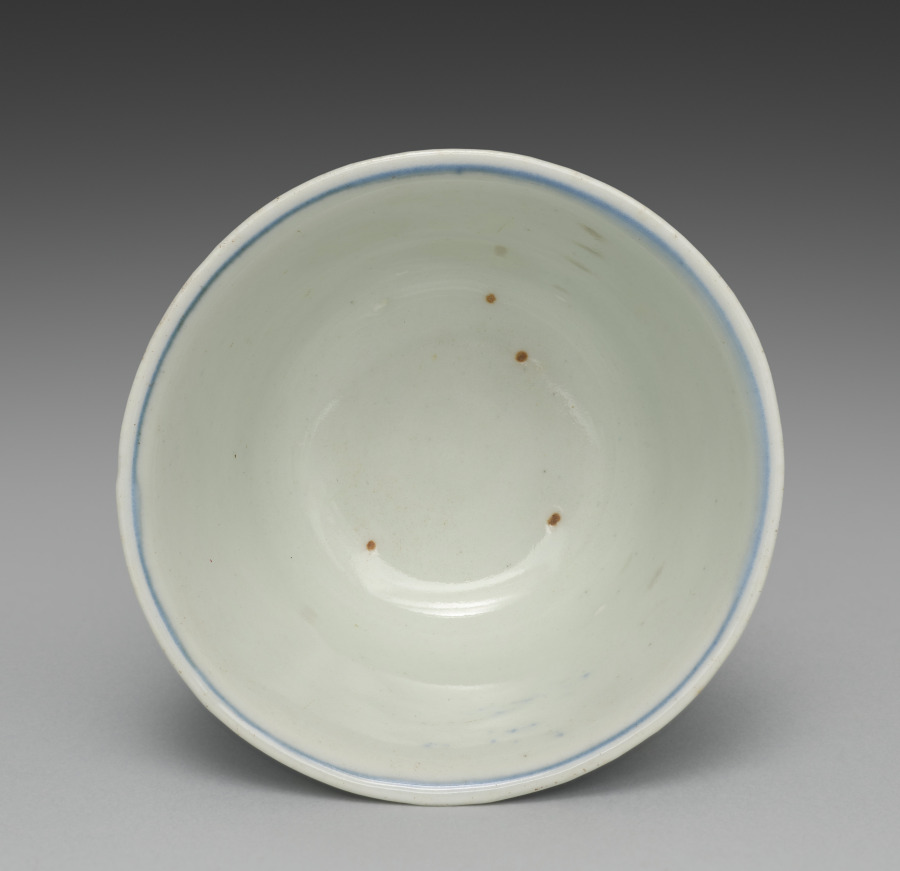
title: Cup from Tea Cups with Dragons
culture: Japan, Edo period (1615–1868)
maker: Seifū Yohei I (Japanese, 1801–1861)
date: 1840s–57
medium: One from a set of five tea cups; porcelain with underglaze blue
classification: Ceramic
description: Seifū Yohei I made both blue and white porcelains after Ming dynasty (1368–1644) Chinese wares fired in the kilns at Jingdezhen for export. He also made colorful stoneware in the style of his teacher, Nin’ami Dōhachi (Takahashi Dōhachi II) (1783–1855).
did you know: A small figure of an elephant serves as the handle for the lid.